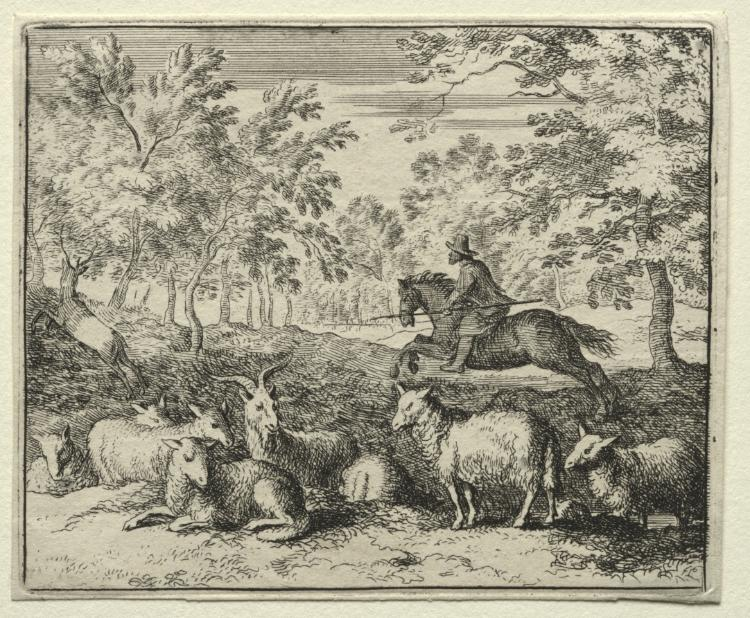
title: Reynard the Fox: The Chase of the Stag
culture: Netherlands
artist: Allart van Everdingen (Dutch, 1621–1675)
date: 1650–75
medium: etching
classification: Print